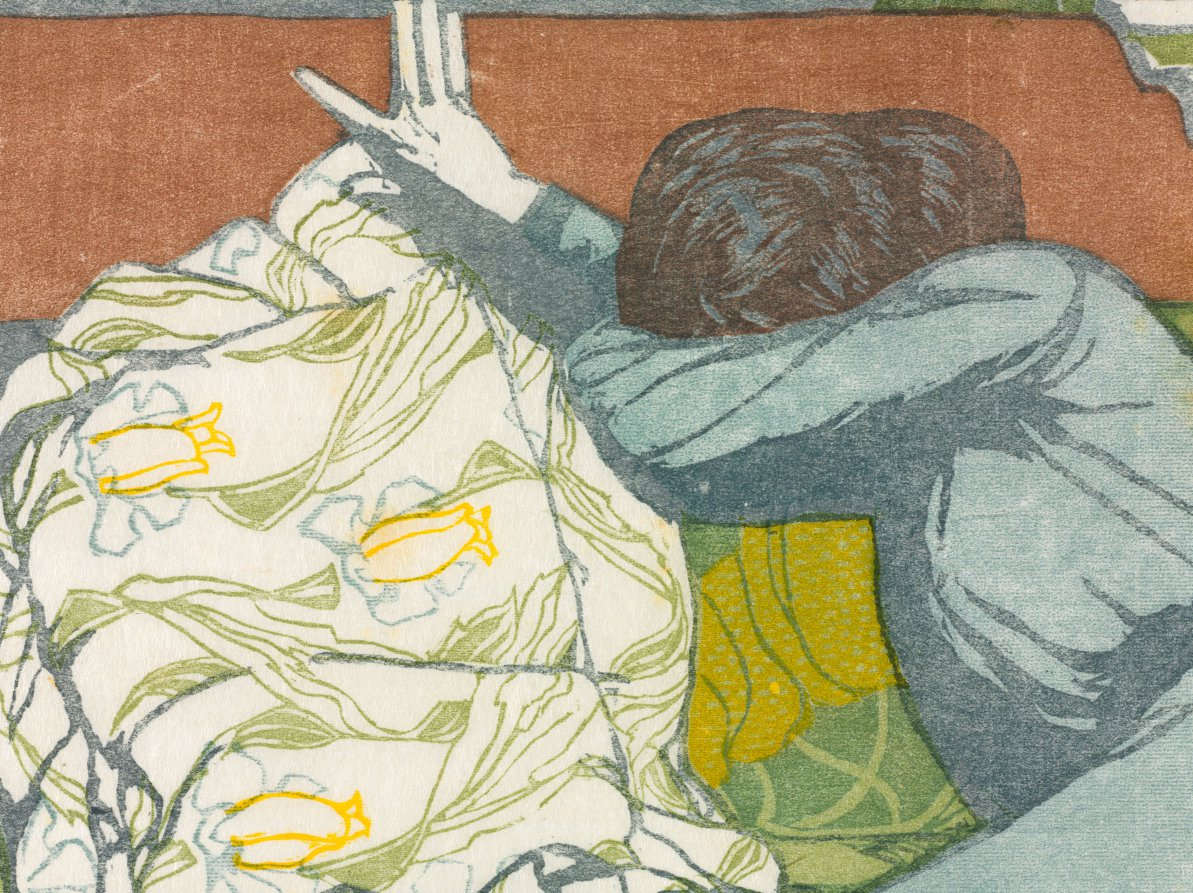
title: The Cushion (Martha Kurzweil Seated on a Divan)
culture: Austria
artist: Max Kurzweil (Austrian, 1867–1916)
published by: Gesellschaft Fur Vervielfaltigende Kunst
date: 1903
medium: color woodcut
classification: Print